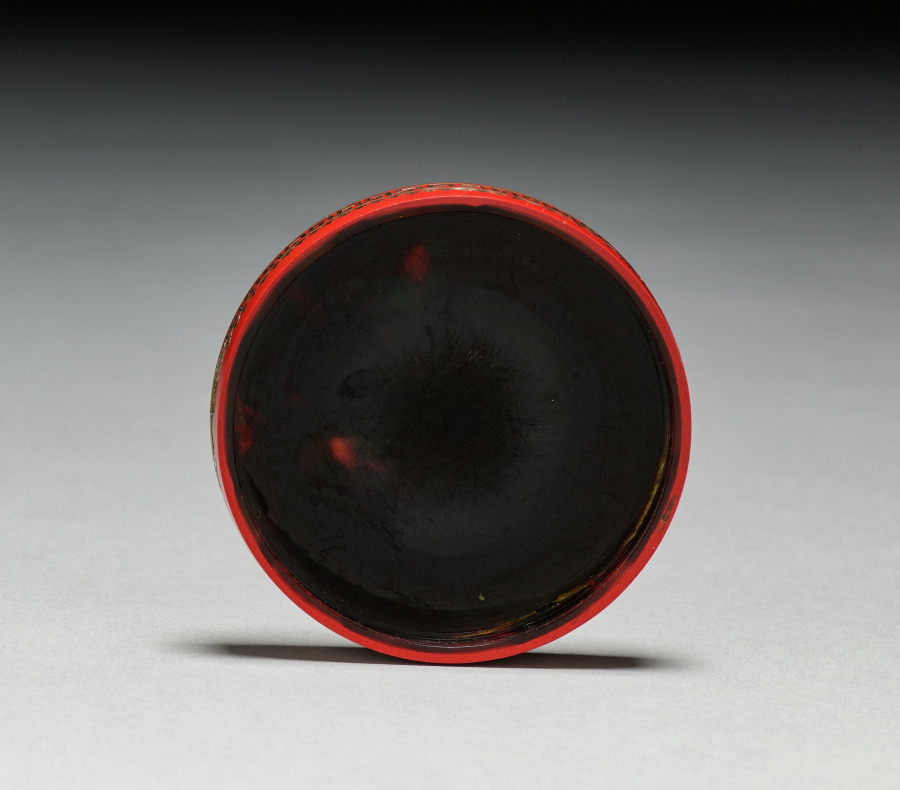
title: Lid for a Round Box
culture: France, 18th century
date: c. 1760–70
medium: Tortoiseshell with red lacquer; inlays of gold, silver, and brass wire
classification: Miscellaneous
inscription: miniature inscribed: annee [?]/1767.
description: This small lacquer box, made in France during the 1700s, references China in that it imitates Chinese material and craftmanship such as red lacquer and celadon. This round box with an inlaid key pattern (an interlocking geometric motif ), emulates the bright vermilion color of Chinese red lacquer, typical of Suzhou lacquer ware. The key pattern is reminiscent of the so-called Chinese thunder pattern (leiwen).